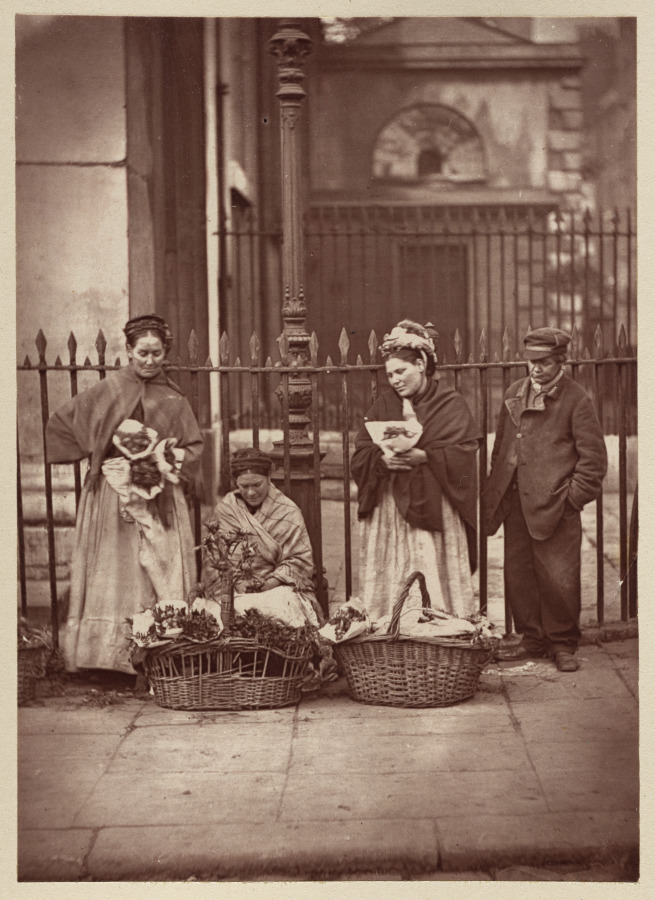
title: Covent Garden Flower Women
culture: England, 19th century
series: Street Life in London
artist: John Thomson (Scottish, 1837–1921)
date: 1877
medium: woodburytype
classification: Photograph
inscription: Stamped in red ink on recto of mount: “COVENT GARDEN FLOWER WOMEN.”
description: Thomson’s collaborator, reporter Adolphe Smith said that “The familiar sight of a poor woman holding a pale child in her arms and offering modest violets to the pedestrian, is pregnant with a poetry which rags, and dirt fail to obliterate.” The jobs, which were passed down between generations, required worked long hours and yielded a meager income.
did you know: These are the real-life counterparts of Eliza Doolittle in the musical My Fair Lady, who started out selling flowers in Covent Garden.